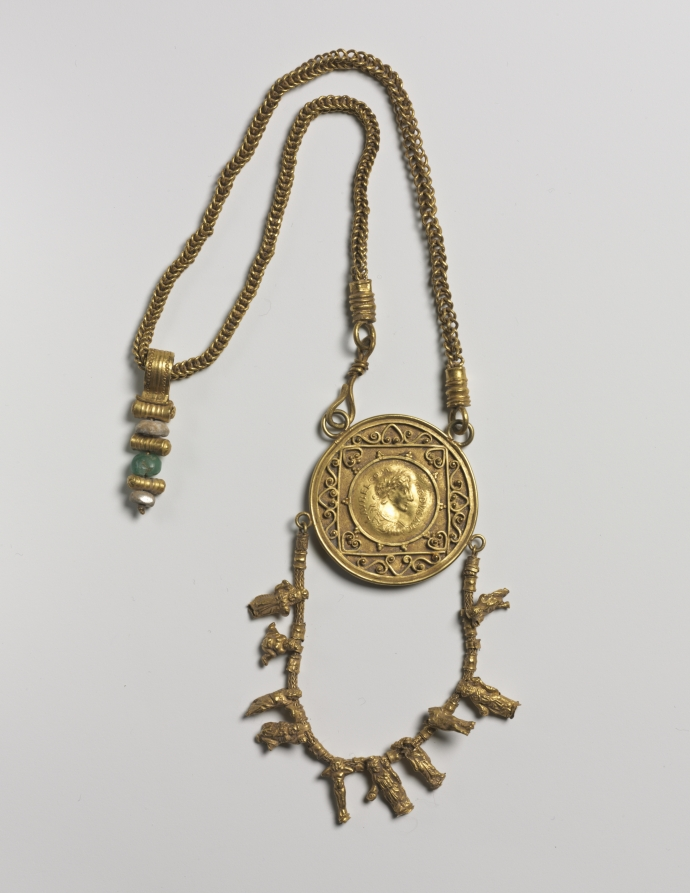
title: Collar with Medallion and Pendant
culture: Egypt, Alexandria, Roman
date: Collar: c. 200–300 CE, Coin: c. 177 CE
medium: gold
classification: Jewelry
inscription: "L. AUREL. COM.MODUS AVG."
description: This necklace is an amalgamation of several different pieces. A thick gold chain is attached to a central medallion, which holds a coin of the Roman emperor Commodus in its center, possibly an ancient replica. A second pendant chain is attached to the bottom of the medallion, strung with ten tiny amulets representing figures of gods, goddesses, and theatrical actors.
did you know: The undamaged pendant figures include, among others, Baubo, Serapis, Isis-Demeter, and a dwarf (perhaps a comic actor).